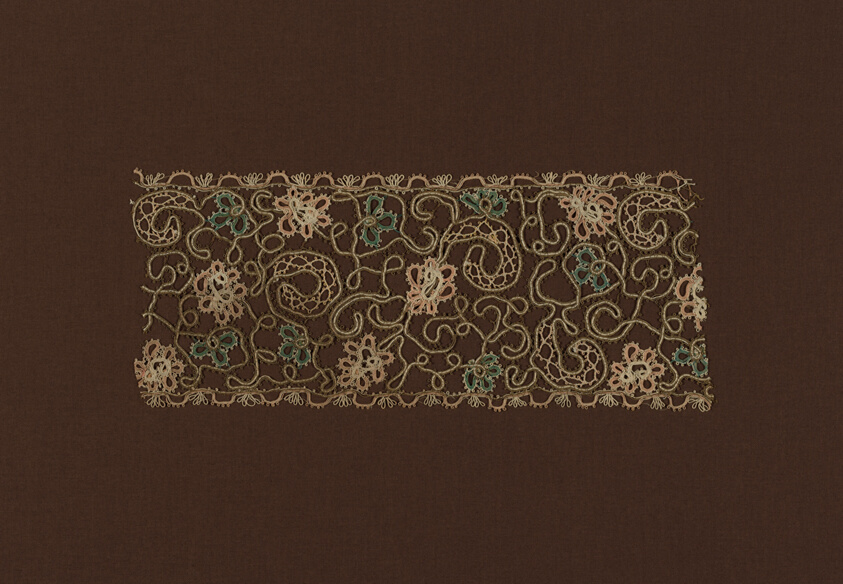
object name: Textile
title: Braid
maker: France or England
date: 1650/75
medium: Silk and silk-wrapped-hemp and silk-wrapped-linen cords, bobbin straight lace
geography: France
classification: textile; lace - bobbin; lace